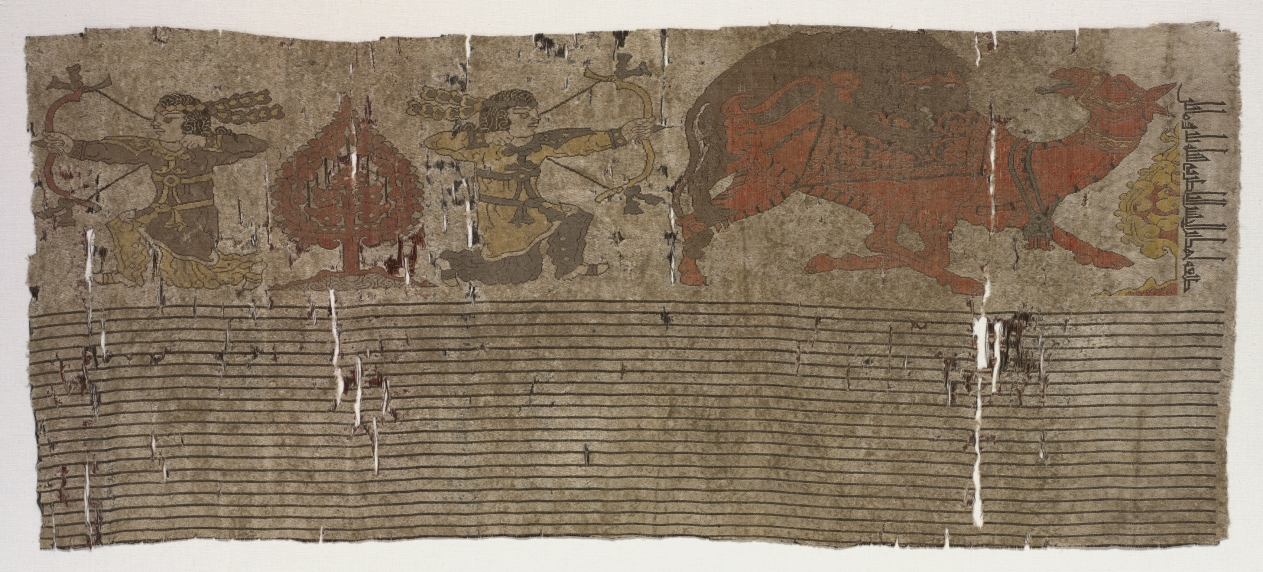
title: Panel with Hunters and Camel and Inscription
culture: Iran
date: 1900s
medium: Silk: lampas weave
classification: Textile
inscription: along the left edge is an Arabic inscription in Kufic script: "Ahmad ibn al-Hasan al-Nasir made it in the year three and two hundred [i.e. 818–819 CE]."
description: On the upper part of the fragment, a kneeling archer aims to the left. On the opposite side of a tree, another archer aims toward a camel. The animal’s mouth is open with its tongue extended in surprise as a large feline pounces on its back. The Arabic inscription along the left edge gives a spurious date and name of the purported maker.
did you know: The lower portion of the silk is woven with 21 parallel lines.